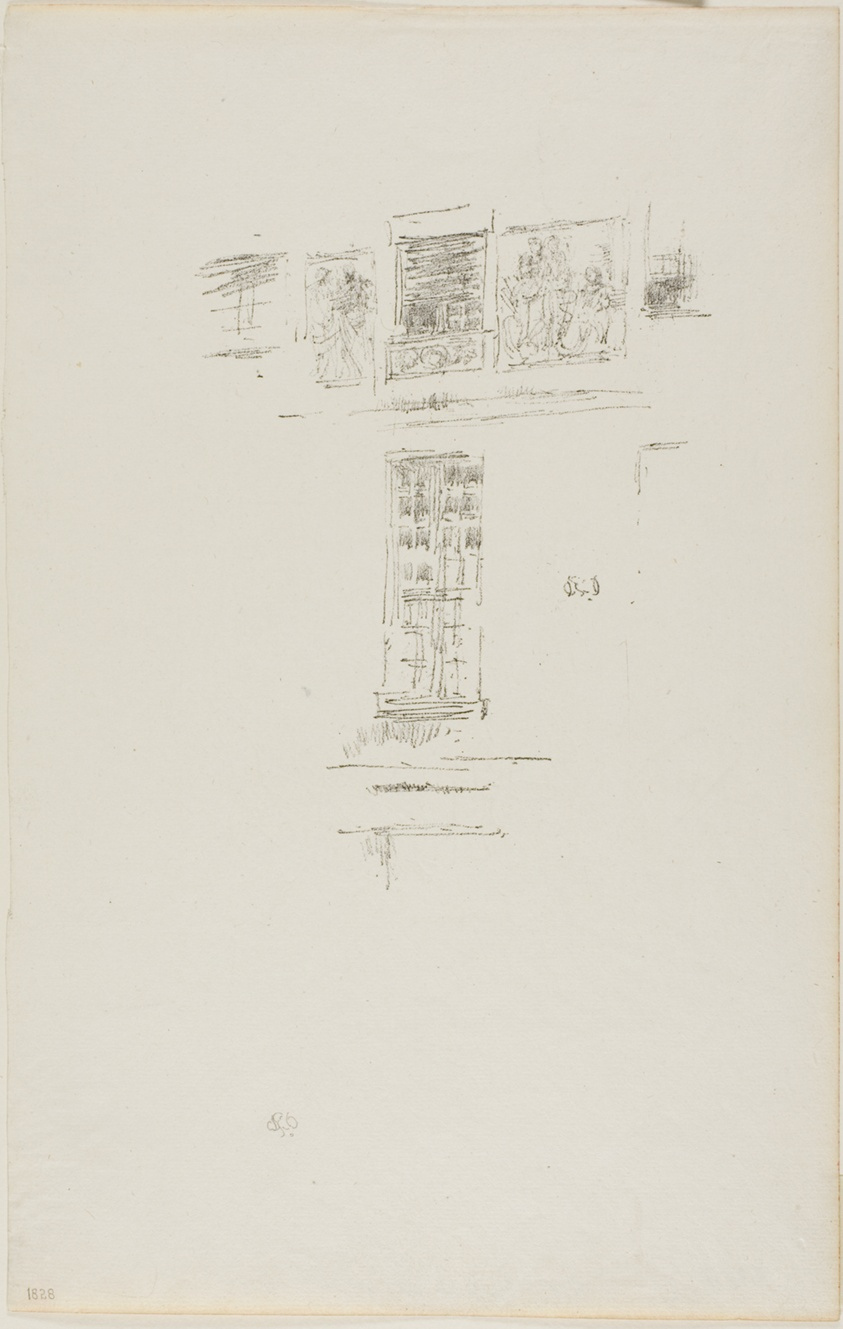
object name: Print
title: Hôtel Colbert, Windows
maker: James McNeill Whistler (American, 1834-1903)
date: 1891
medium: Transfer lithograph in black on ivory laid paper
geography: United States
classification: transfer lithograph; lithograph; print; prints and drawing; paper